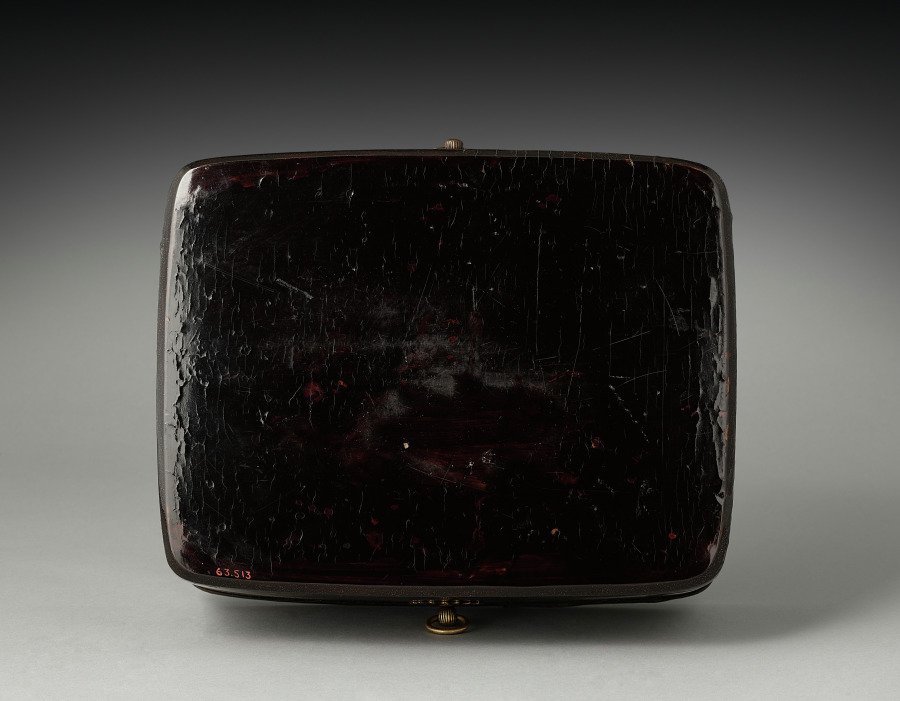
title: Cosmetics Box with Chrysanthemums (base)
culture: Japan, Kamakura period (1185–1333)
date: early 1300s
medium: lacquer on wood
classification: Lacquer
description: In China, the chrysanthemum was historically appreciated for its association with the Double Nine Festival and the reclusive life of the poet Tao Yuanming (AD 365-427). In Japan, the 16-petaled chrysanthemum came to symbolize the Japanese imperial family after Emperor Gotoba (1180-1239) chose the motif as his personal emblem, having it applied to his sword and everyday utensils. This box proves that the flower also appeared on lacquer wares as early as the Kamakura period.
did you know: In Japanese, this type of small box is called a tebako, literally a hand box, and was typically part of a cosmetics set.